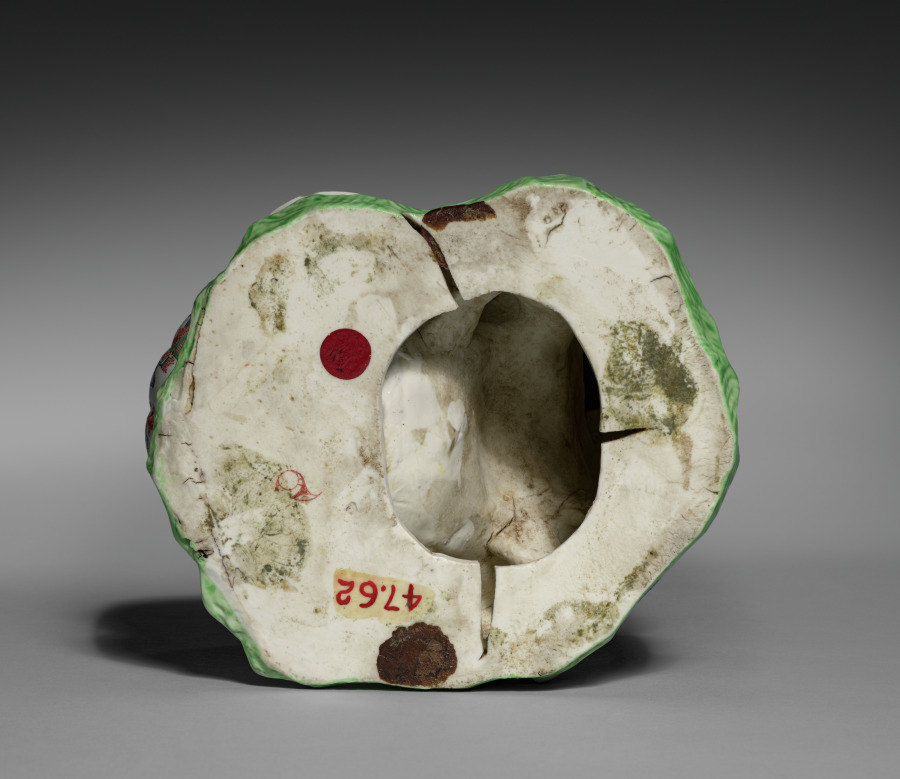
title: Figure of a Chinese with Jar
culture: France, Chantilly, 18th century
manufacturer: Chantilly Porcelain Factory (French)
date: c. 1735– 1740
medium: soft-paste porcelainwith enamel decoration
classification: Ceramic